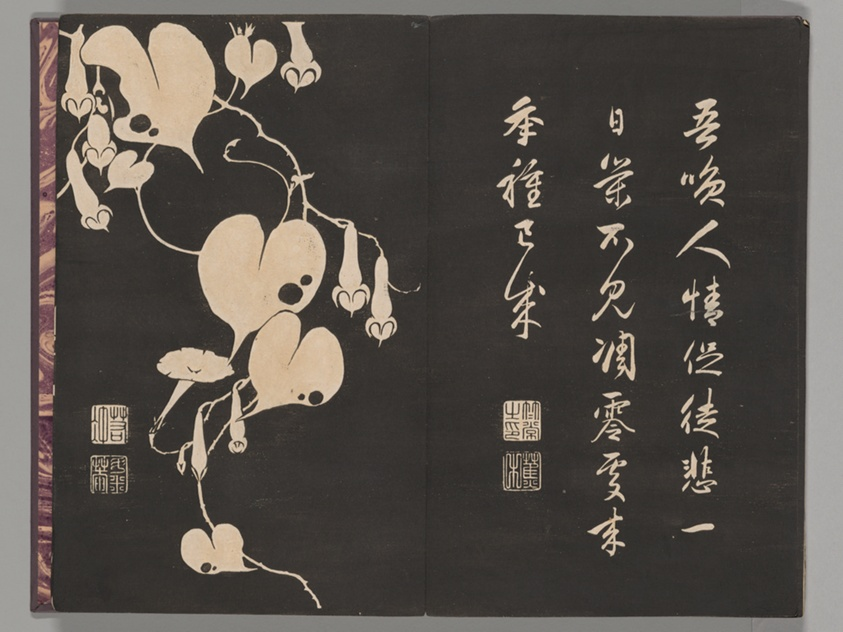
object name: Book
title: Soken sekisatsu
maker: Ito Jakuchu (Japanese, 1716-1800)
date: 1767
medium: Woodblock printed book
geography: Japan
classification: book